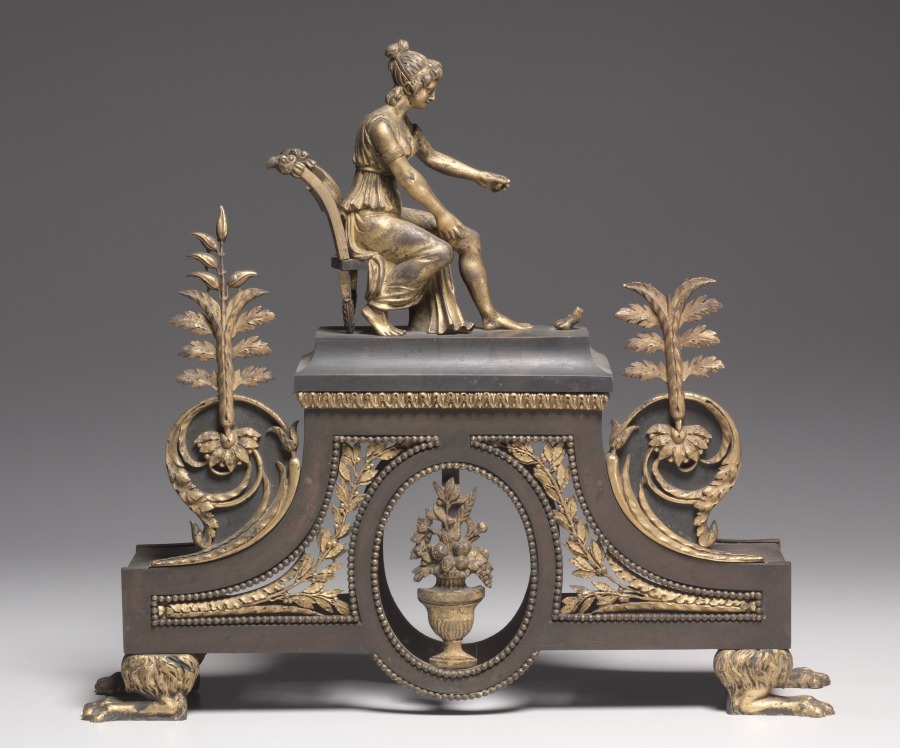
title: Pair of firedogs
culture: France, 18th century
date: c. 1790–1800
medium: bronze and gilded bronze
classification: Furniture and woodwork